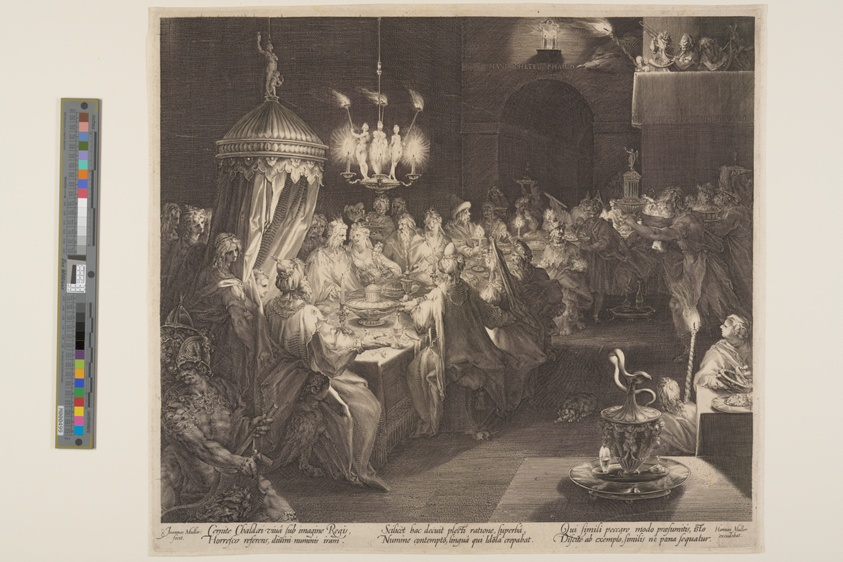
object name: Print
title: Belshazzar’s Feast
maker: Jan Harmensz Muller; Dutch, 1571–1628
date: c. 1598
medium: Engraving on ivory laid paper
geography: Netherlands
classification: engraving; paper; print; prints and drawing